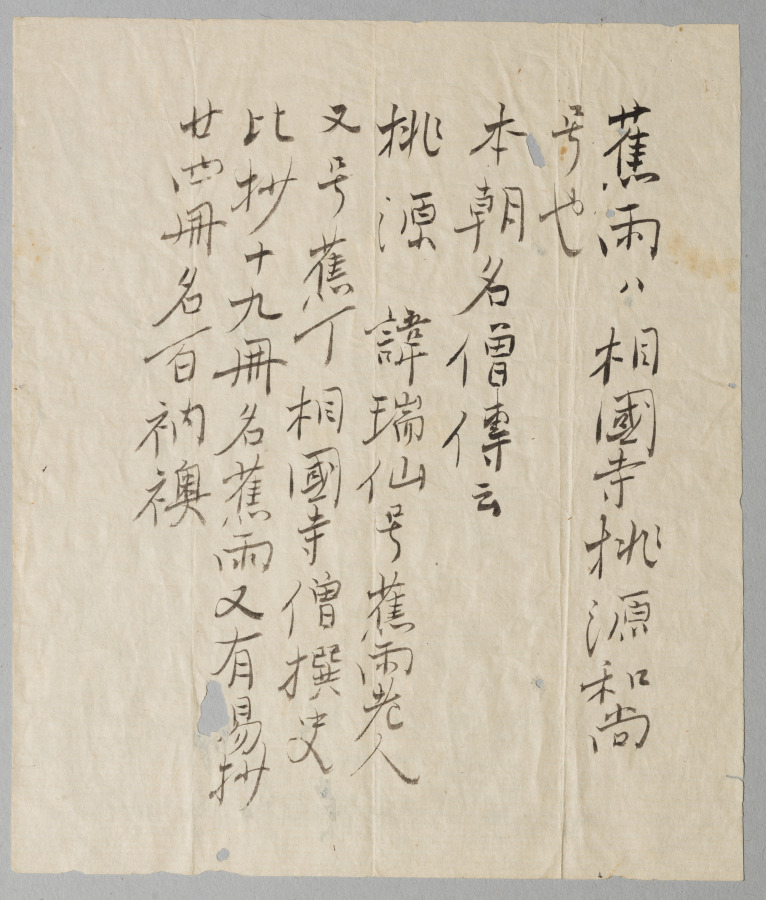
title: Landscape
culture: Japan, Muromachi period (1392–1573)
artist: attributed to Kenkō Shōkei (Japanese, active 1478–1506)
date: late 1400s–early 1500s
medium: hanging scroll, ink and light color on paper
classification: Painting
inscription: inscription above signed Shō'u Kojin; calligraphy by the Shokōji priest Tōgan Zuisen 桃源瑞仙 (1430–89)